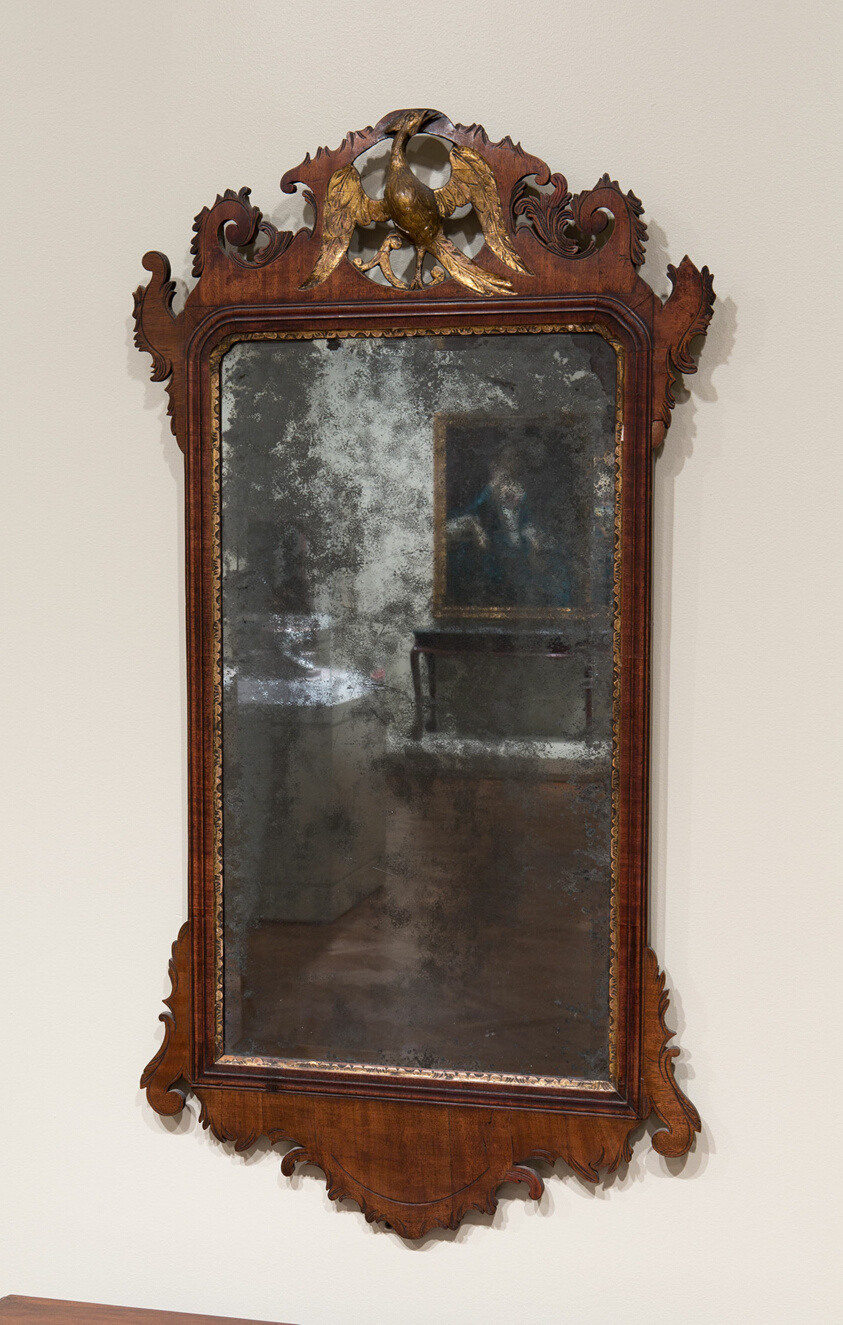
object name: Decorative Arts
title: Looking Glass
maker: Artist unknown (American or English, 18th century)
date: 1760–90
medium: Mahogany veneer, cedar, and spruce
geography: United States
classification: furniture accessory; american decorative arts; american arts; decorative arts